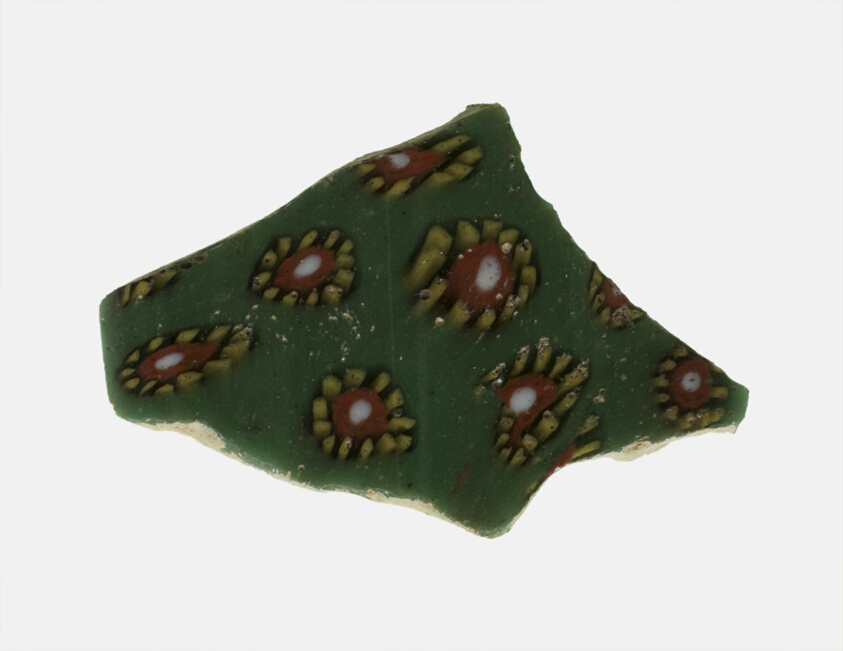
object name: Decorative Arts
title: Fragment of a Cup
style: roman (ancient, style or period), ancient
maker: Roman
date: 1st century BCE–1st century CE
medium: Glass, mosaic glass technique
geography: Italy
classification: fragment; decorative arts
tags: decoration